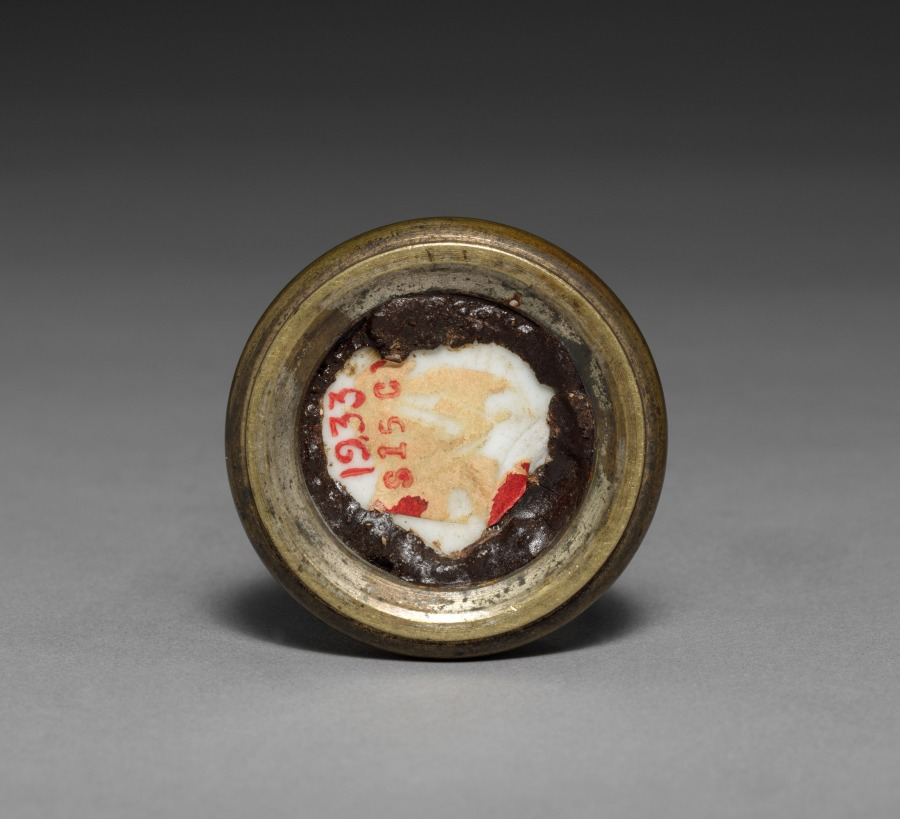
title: Imari Ware (?) Container with Brass Mounts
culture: Japan, Edo period (1615–1868)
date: late 1600s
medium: porcelain with brass mounts (possibly Hizen ware, Arita type, Imari style)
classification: Ceramic